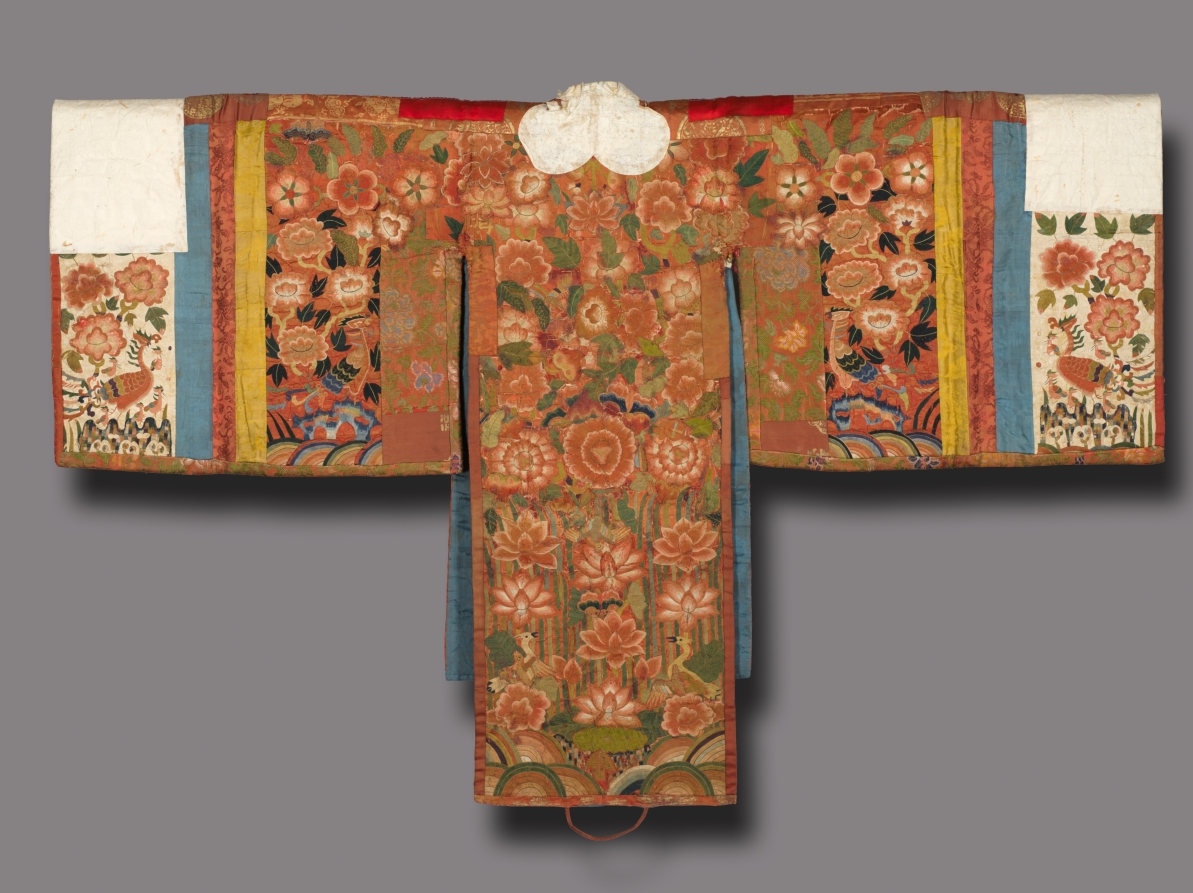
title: Bridal Robe (Hwarot)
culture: Korea, Joseon dynasty (1392–1910)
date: 1850–1910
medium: Satin weave silk; silk embroidery; paper edging on neck and sleeves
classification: Garment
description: This bride's robe is exquisitely embroidered with various symbols of happiness in colorful silk threads. Butterflies stand for marital happiness; the phoenix, numerous offspring; and lotus flowers and white cranes, longevity. Yet, the bridal robe does not attest to the life of luxury. To the contrary, many traces of repairs, trimmings, and patchwork reflect Joseon period women’s commitment to value neo-Confucian aesthetics of frugality and modesty. Substantial repairs and patching reveal that this robe served as an important communal resource to be shared and passed down through several generations. Its collar and sleeves are covered in thick white paper; this paper is replaced with new paper for each bride, while the robe itself was reused for decades.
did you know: This bride's robe was not made for one specific bride, but rather was shared and passed down to many brides.